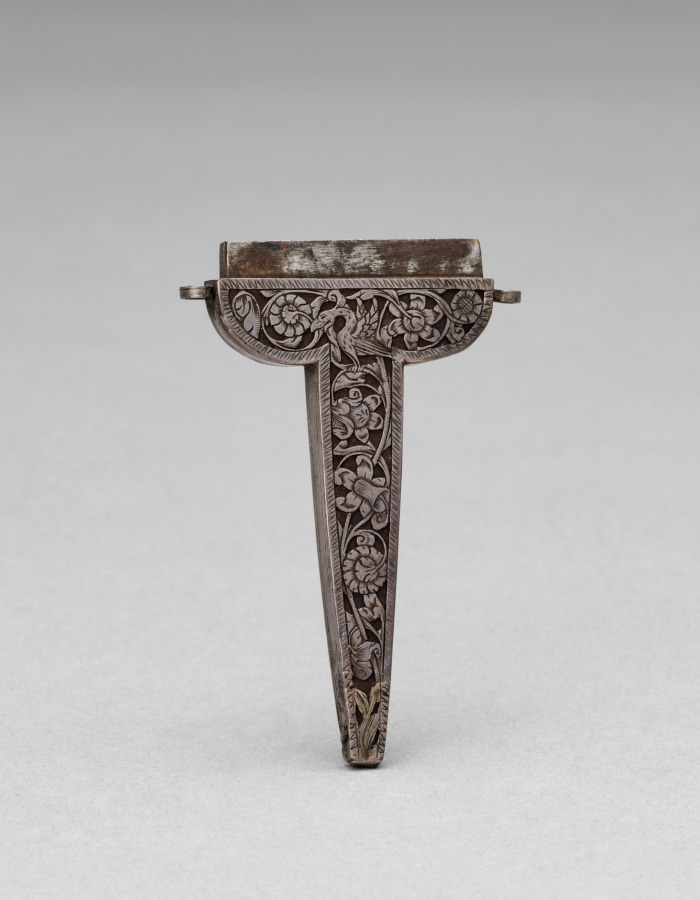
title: Scissors Case (Etui)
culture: The Netherlands or France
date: c.1690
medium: silver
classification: Silver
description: Attached to a belt loop, silver scissor cases were practical fashion accessories. Intricately designed and expensively produced, they demonstrated the wealth of a wearer. Cases like this one were often decorated with motifs of love and given as traditional wedding or engagement gifts. On one side of this case, two putti raise a heart above their heads, on the other they defend it with a pair of crossed spears.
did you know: The inscription on this scissor box reads “TOVS. OV. RIEN” (all or nothing) on one side and “IE. PERIRAI. PLVSTOS” (I would rather die) on the other.